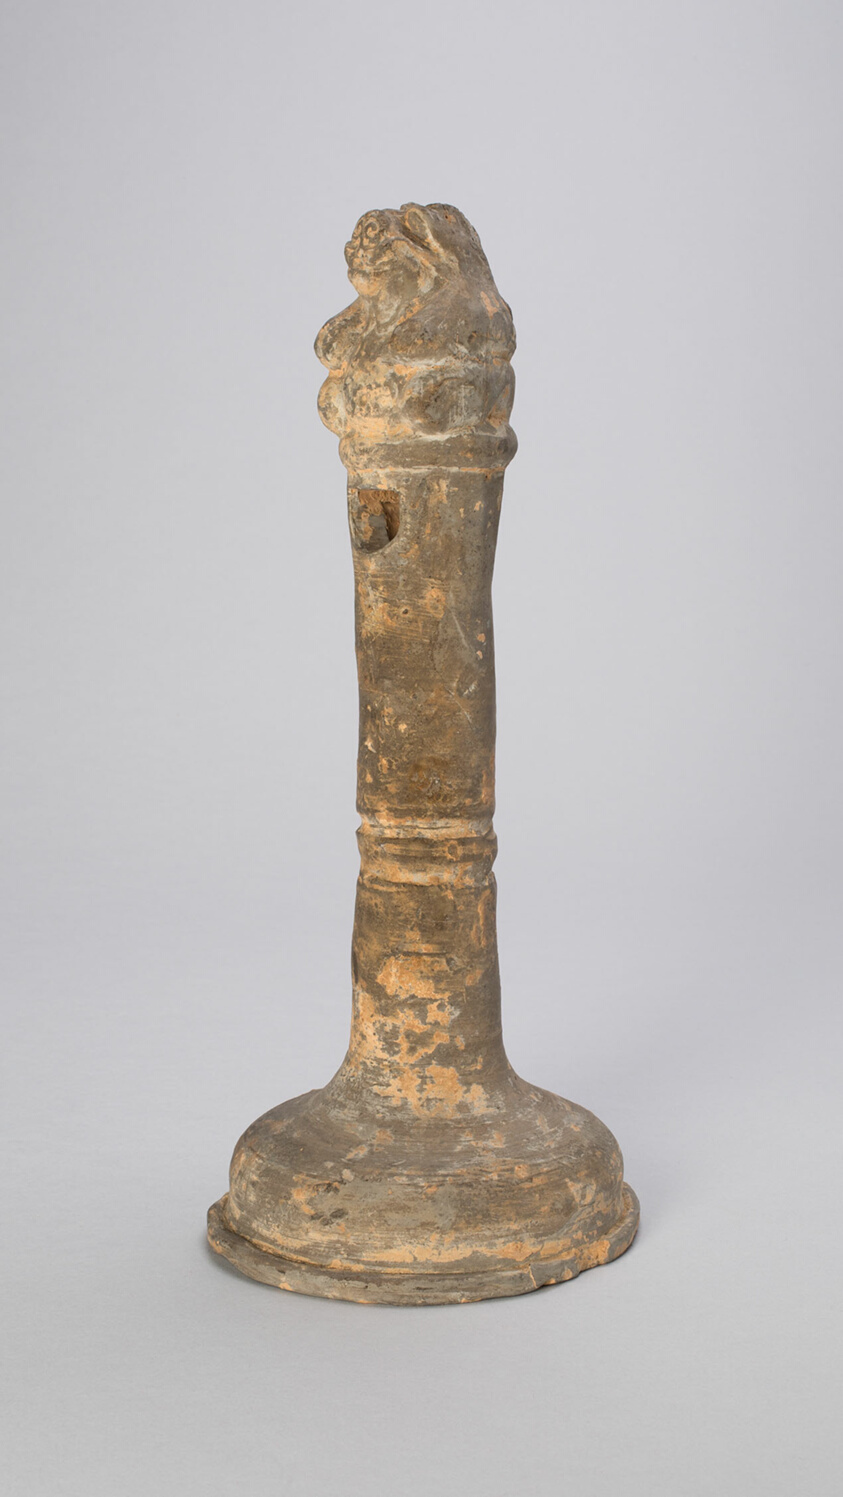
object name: Sculpture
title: Pedestal with Squatting Bear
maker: China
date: Han dynasty (206 B. C.–A.D. 220)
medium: Earthenware with molded decoration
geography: China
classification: ceramics; asian art; sculpture